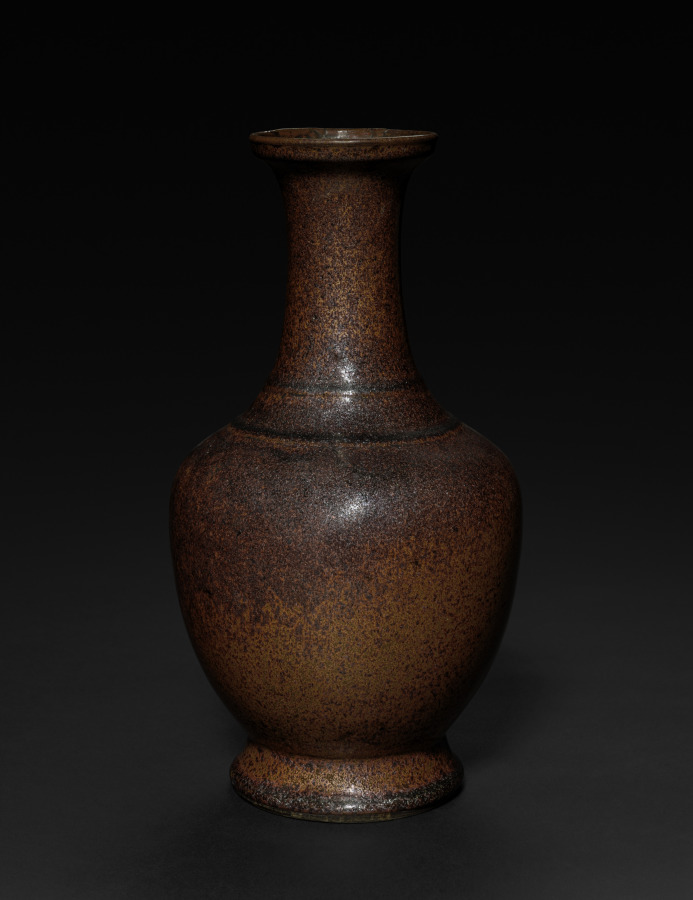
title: Vase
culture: China, Qing dynasty (1644–1911), Qianlong reign (1736–95)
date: 1736–95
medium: porcelain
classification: Ceramic